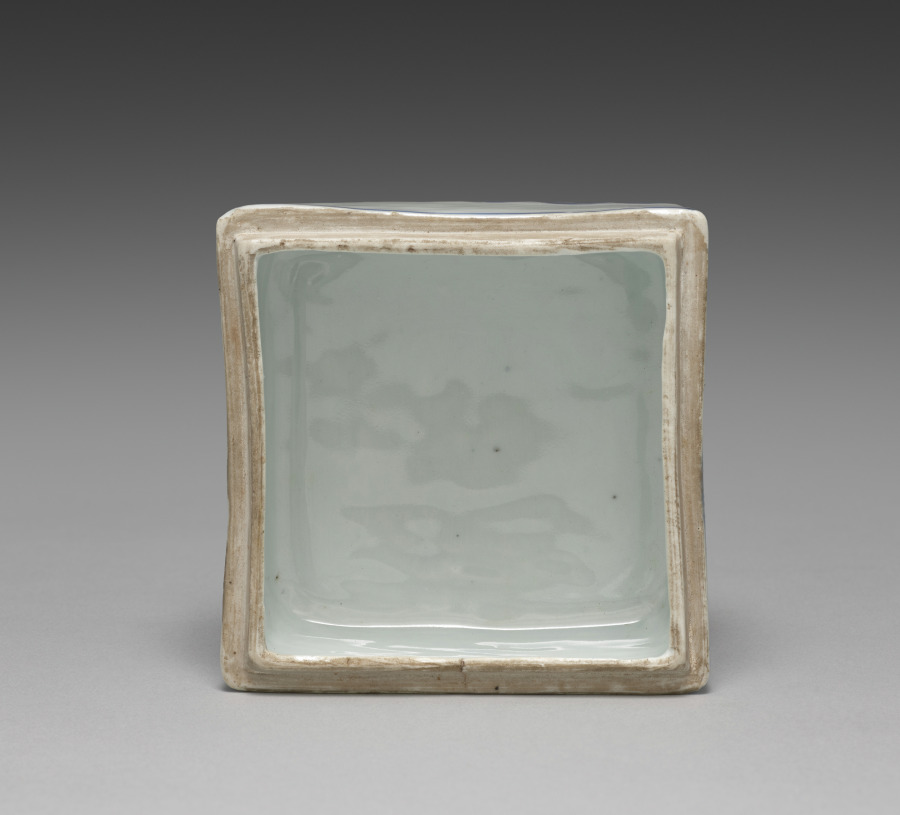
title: Box with Butterfly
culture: Japan, Meiji period (1868–1912)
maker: Seifū Yohei I (Japanese, 1801–1861)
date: 1855–57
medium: Porcelain with underglaze blue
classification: Ceramic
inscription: 清風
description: This sturdy box, with comparatively thick walls and resulting heft, is sparsely decorated with a single butterfly motif in dark underglaze blue cobalt in one corner of the lid and with repeating floral patterns along the lid and base. Single broken lines of underglaze blue define the edge of the box lid’s top where it curves to meet the sides and again where it meets the base of the box. Another blue band runs around the upper rim of the base where it meets the lip, left unglazed for a better grip of the lid when the box is closed. Yohei I’s signature on the center of the recessed base is set within a wide blue square. The porcelain box is meant to call to mind a famous story attributed to Zhuang Zhou (c. 369–286 BCE), also known as Master Zhuang, or Zhuangzi, pronounced Soji in Japanese. The second chapter of Zhuangzi, his eponymous collection of anecdotes, records the story as follows: Once, Zhuang Zhou dreamt he was a butterfly, a butterfly flitting and fluttering about, happy with himself and doing as he pleased. He didn’t know that he was Zhuang Zhou. Suddenly, he woke up and there he was, solid and unmistakable Zhuang Zhou. But he didn’t know if he was Zhuang Zhou who had dreamt he was a butterfly, or a butterfly dreaming that he was Zhuang Zhou. Between Zhuang Zhou and the butterfly there must be some distinction! This is called the Transformation of Things. The lidded box resembles kosometsuke, the porcelains in underglaze blue made to order or on speculation for the Japanese market during the early to mid-1600s in Jingdezhen, China. These works were often made from designs submitted by Japanese clients, many of whom were masters of chanoyu, who sought the wares for their tea practice. The relative roughness of the clay and the distortions in the fired object were intentional, as they created the rustic effect desired by Japanese tea communities.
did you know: Seifū Yohei I made blue and white porcelains after Ming dynasty (1368–1644) Chinese wares fired in the kilns at Jingdezhen for export.